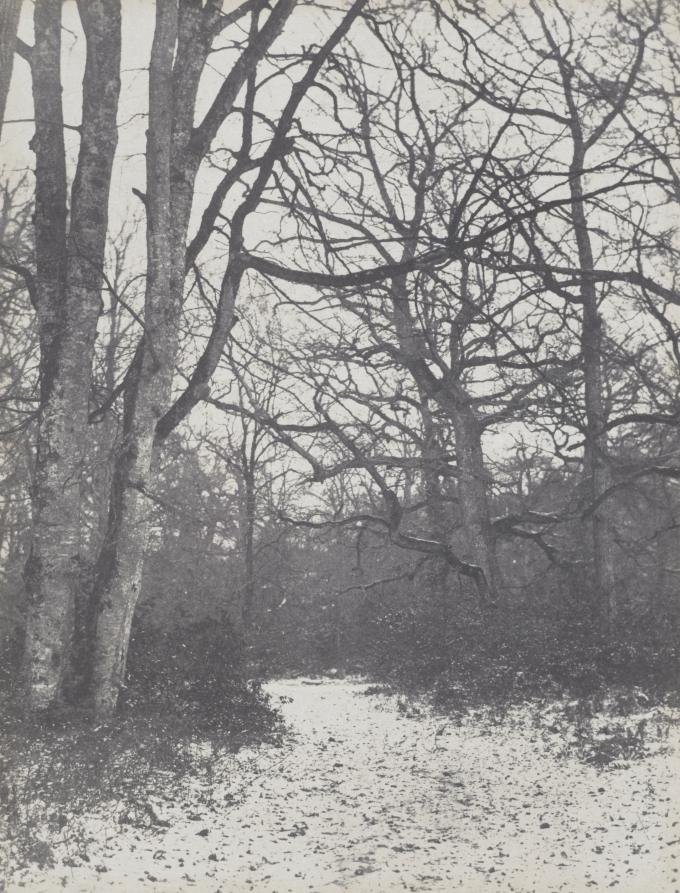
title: Road in the Forest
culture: France, 19th century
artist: Eugène Cuvelier (French, 1837–1900)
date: 1860–1863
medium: salted paper print from waxed paper negative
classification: Photograph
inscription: Written in pencil on recto of mount: "6"; in pencil on verso: "7"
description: Eugène Cuvelier was a landscape painter as well as a photographer. During the 1850s and 1860s, he photographed in an number of forests near Paris. He was also associated with the Barbizon painters, a group working in the village of Barbizon that advocated the direct study of nature. This exquisite snow scene exemplifies Cuvelier's distinguished and influential landscape work. The artist took advantage of the inherent softness of his photographic process to create an atmospheric rendering of a winter scene with a curving pathway that draws the viewer into the dense, barely defined background of foliage. Many of the trees Cuvelier recorded disappeared soon after the photographs were taken.